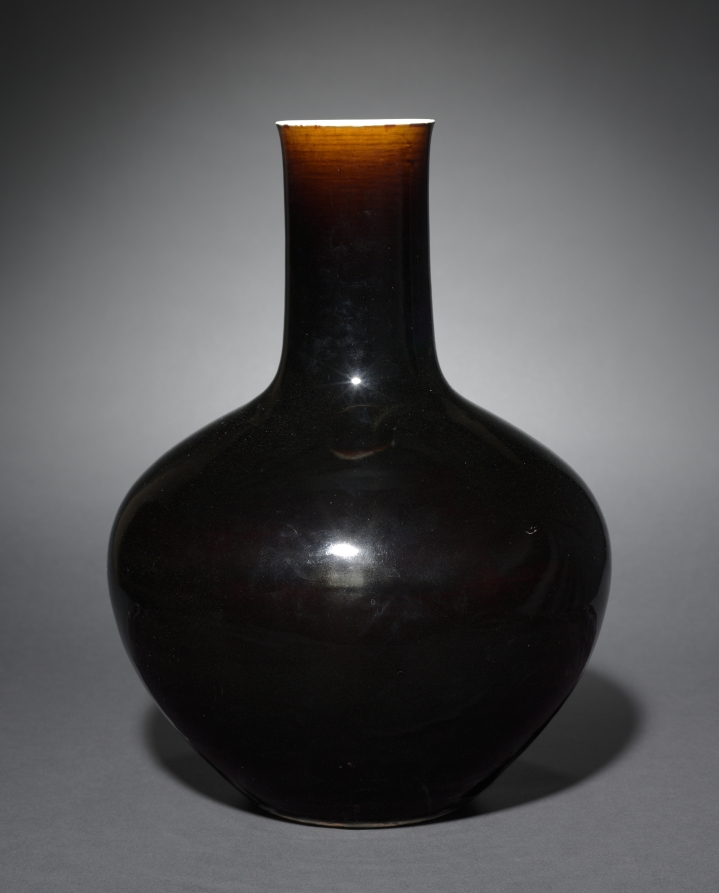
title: Bottle-Shaped Vase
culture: China, Jiangxi province, Jingdezhen kilns, Qing dynasty (1644–1911), Qianlong reign (1736–95)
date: 1736–95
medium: porcelain with mirror-black glaze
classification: Ceramic